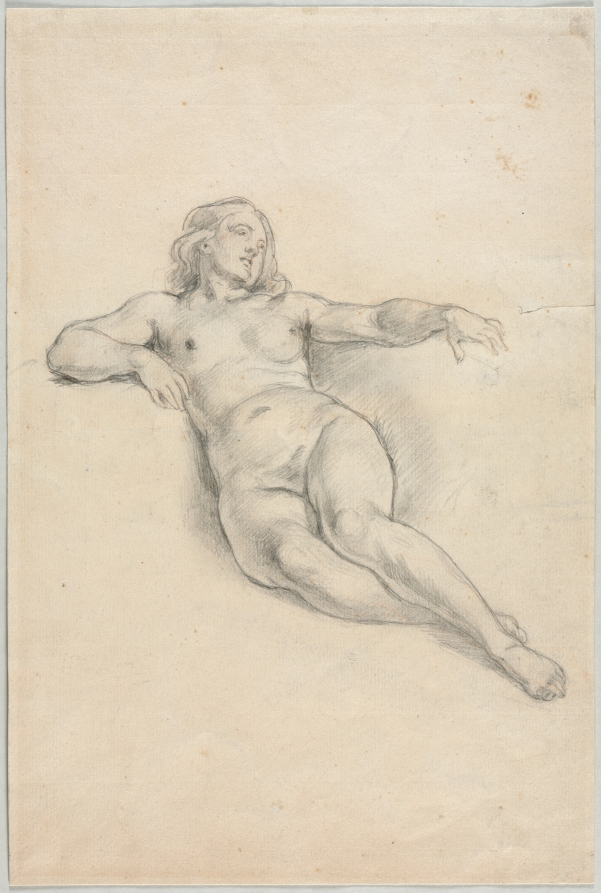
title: Reclining Female Nude (recto)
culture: France, 19th century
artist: Anonymous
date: 19th century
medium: graphite, with stylus and traces of red gouache(?)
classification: Drawing